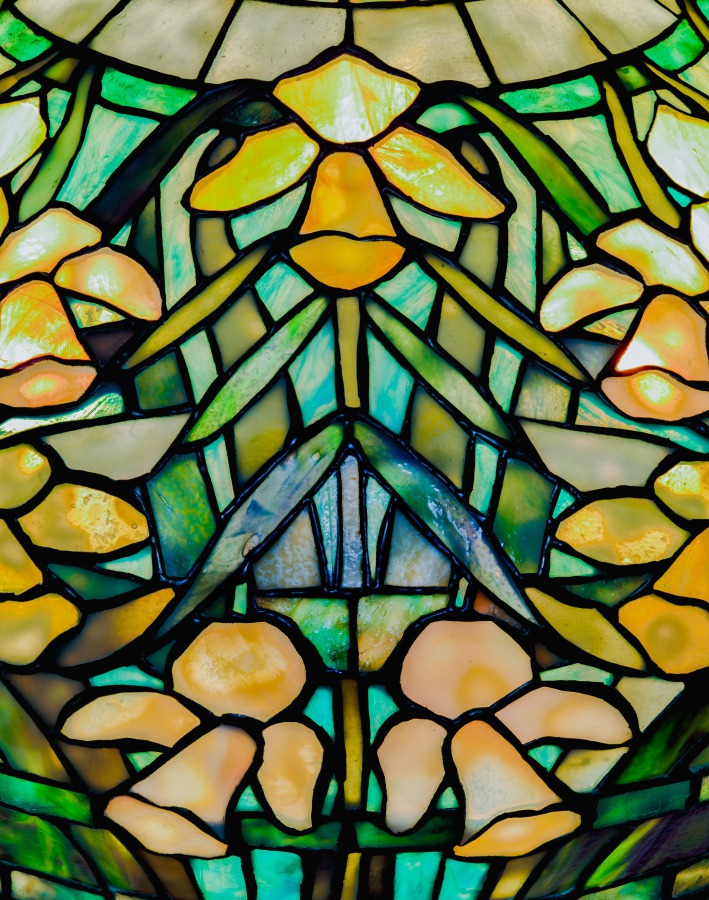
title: Daffodil Table Lamp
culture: America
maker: Tiffany Studios (United States, New York, 1902–32)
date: c. 1910–13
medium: Leaded glass, blown glass, bronze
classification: Lamp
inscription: TIFFANY STUDIOS NEW YORK 3171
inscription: TIFFANY STUDIOS/NEW YORK/25922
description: In the 1870s a renewed emphasis on natural landscapes ushered in a generation of cottage gardeners who delighted in planting perennials in large quantities. Louis Comfort Tiffany was among those who championed the lush, sometimes wild-looking displays of varied floral species in the garden at his Long Island estate, Laurelton Hall. Tiffany encouraged his designers to take inspiration from his garden by shipping fresh cuttings almost weekly to his studios. Ohio native Clara Wolcott Driscoll and her team of female designers created floral patterns for lamps and mosaics based on the colorful blooms of spring that became among the most sought after and commercially successful of Tiffany’s production.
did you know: Giant bronze crabs, likely cast from a real crustacean, set the scene for this rare Tiffany Studios base in which green glass is blown into a bronze cage—a very difficult technique since glass and bronze cool at different temperatures risking a complete shatter if not executed correctly.